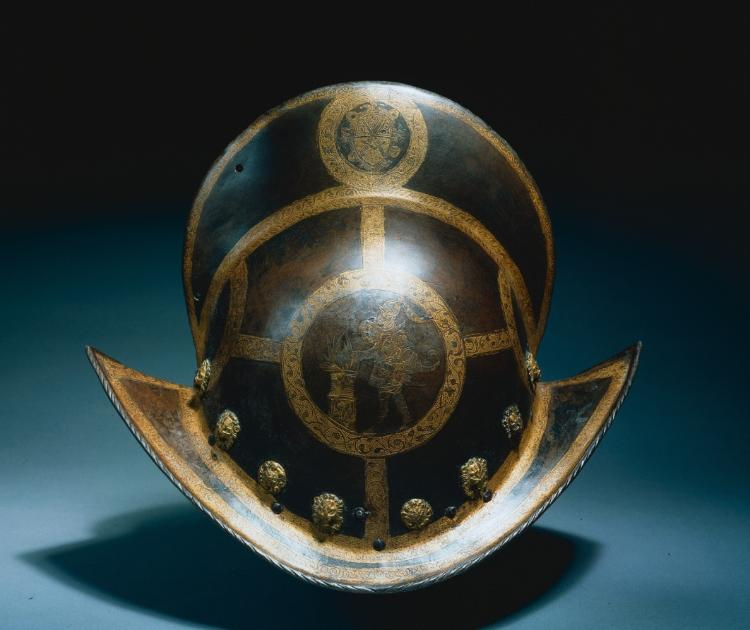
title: Morion of the State Guard of Elector Christian I of Saxony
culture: Germany, Nuremberg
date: c. 1580–91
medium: russet steel, etched and gilded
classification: Arms and Armor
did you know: Christian I of Saxony outfitted his palace guards with black and yellow outfits topped off with a coordinated helmet like this one to highlight his grandeur and refinement. The Saxon coat of arms is also proudly displayed on the crest of this helmet.